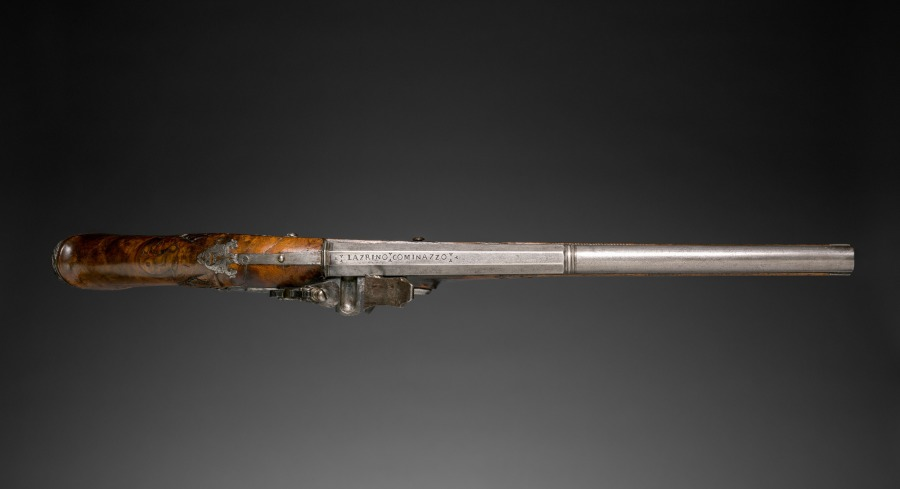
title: Flintlock Pistol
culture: Italy, Brescia, late 17th century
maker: Gio Borgognone (Italian)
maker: Lazarino Cominazzo (Italian)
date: c. 1690–1700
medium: steel, chiseled steel with walnut stock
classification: Arms and Armor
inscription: barrel signed: Lazarino Cominazzo; lockplates signed: Gio Borgognone in Bresia